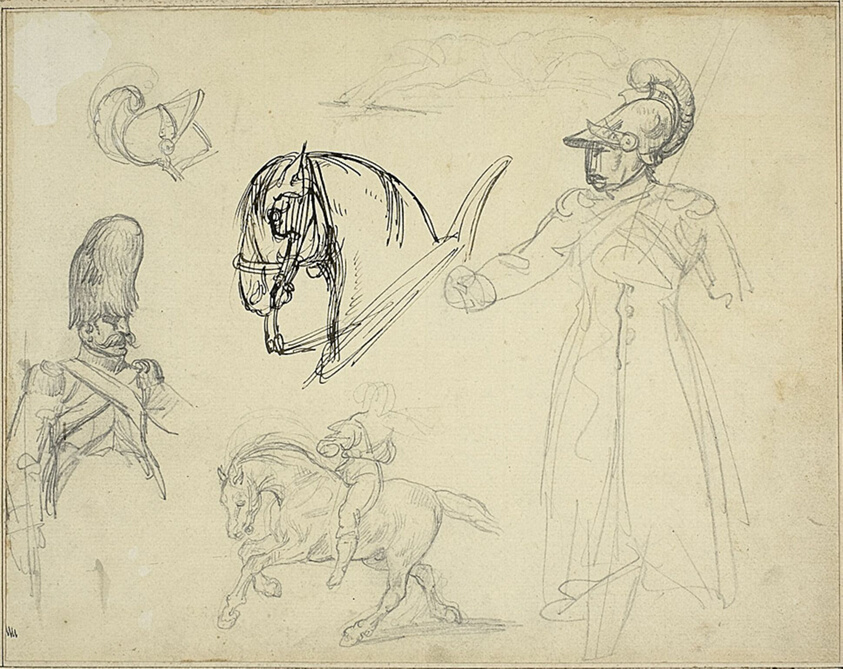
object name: Drawing and Watercolor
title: Sketches of Horses and Soldiers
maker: Jean Louis André Théodore Géricault (French, 1791-1824)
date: c. 1818–1819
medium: Graphite and pen and brown ink, on cream laid paper, perimeter mounted on cream wove paper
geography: France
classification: graphite; drawings (visual works); prints and drawing